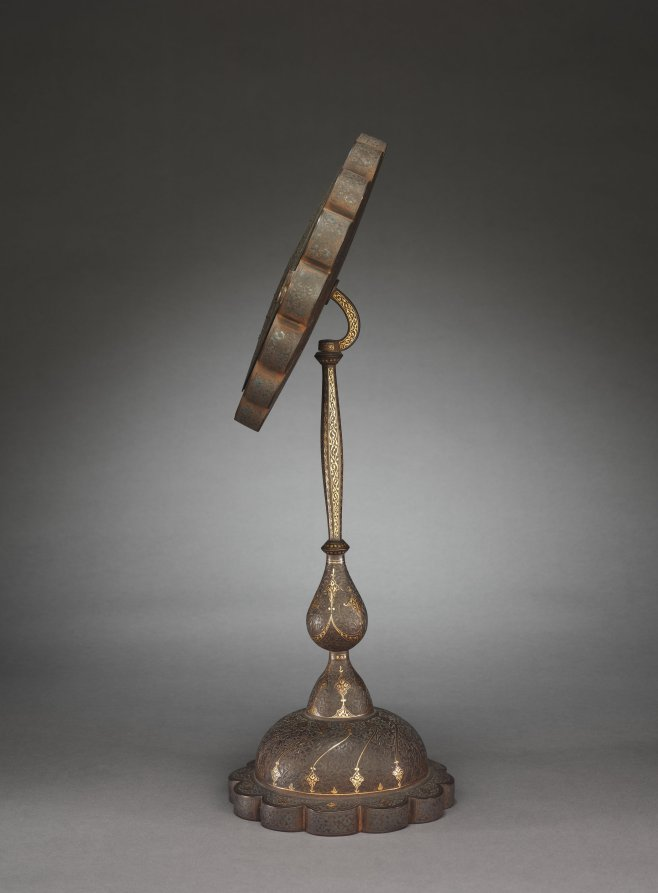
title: Mirror Stand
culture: Iran, Qajar period (1779-1925)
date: 1800s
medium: Steel engraved and inlaid with gold and silver with openwork calligraphic design on hinged door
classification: Metalwork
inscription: Selection from the inscriptions in the surrounding ring: نه هر که چهره برافروخت دلبری داند. نه هر که آینه سازد سکندری داند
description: The mirror was both a courtly accouterment and a popular poetic device in Persian literature. The central circular panel has a hinge and hook that opens to reveal the mirror. The texts in the ring are verses by different authors referring to mirrors. One says: Have they placed a mirror facing the sun at the door of that tent, Or is it the light rays shining from the forehead? Such mirrors were popular during the Qajar period (1779–1925), but this example evokes the grandeur of the earlier Safavid period by inscribing in the center the name of Shah Sulayman (1648–1694) who, fittingly, spent most of his 28-year reign with women in the harem, where such mirrors would have been used.